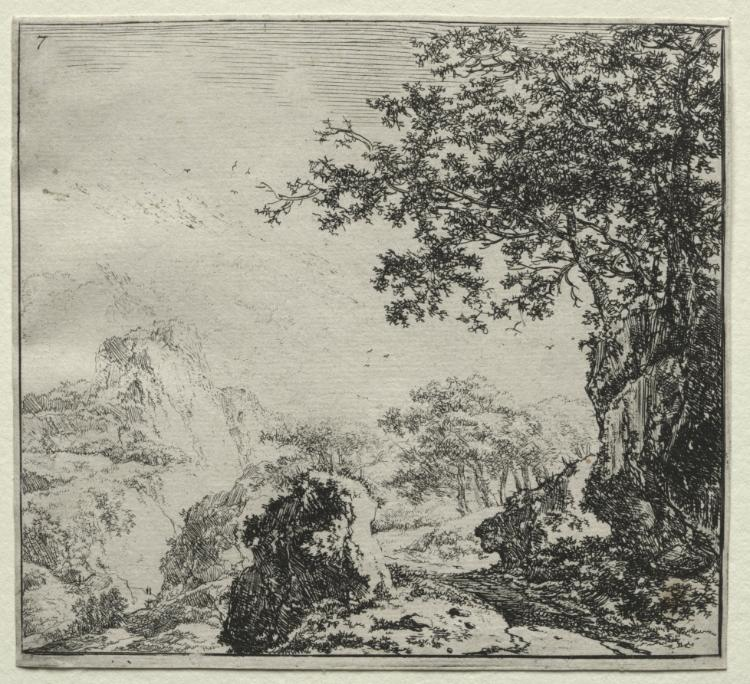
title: The Road near the Rocks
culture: Flanders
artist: Herman Naiwincx (Flemish, c. 1624–after 1651)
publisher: Clement de Jonghe (Dutch, 1579–1679)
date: 1640–51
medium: etching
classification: Print